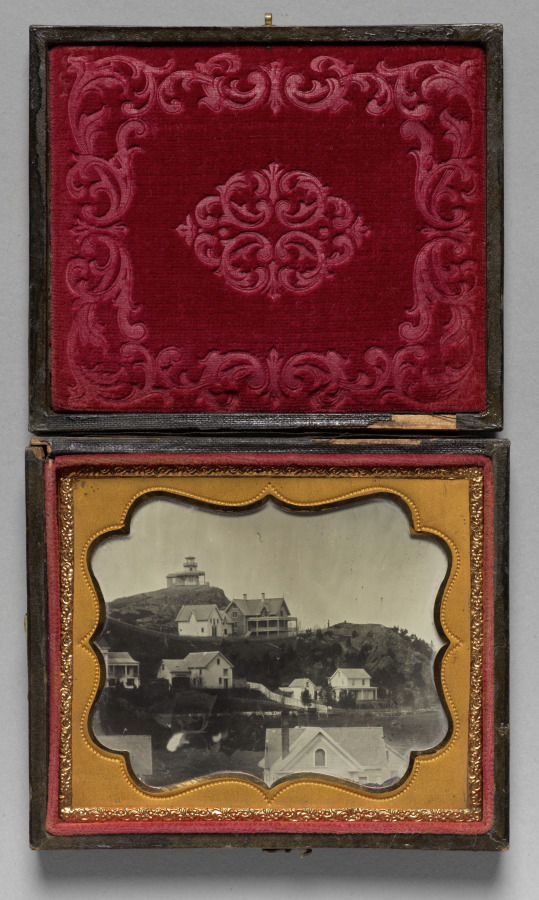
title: High Rock Tower and Stone Cottage, Lynn, Massachusetts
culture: America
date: c. 1862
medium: ambrotype, sixth plate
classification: Photograph